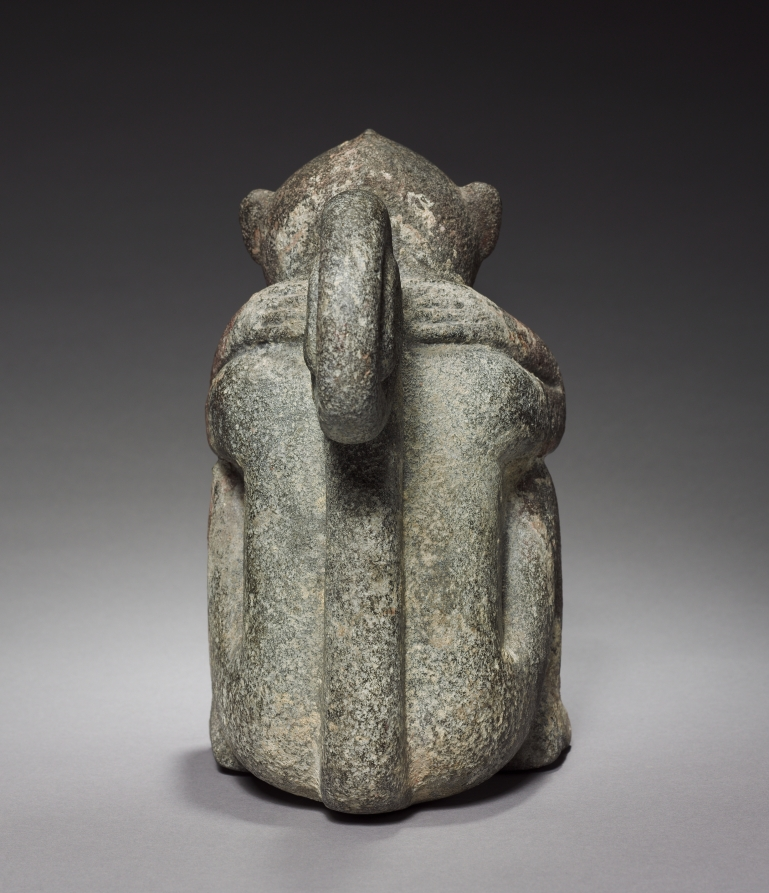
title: Monkey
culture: Central Mexico, Tacuba, Aztec, Post-Classic Period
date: 1325–1519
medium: stone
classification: Stone